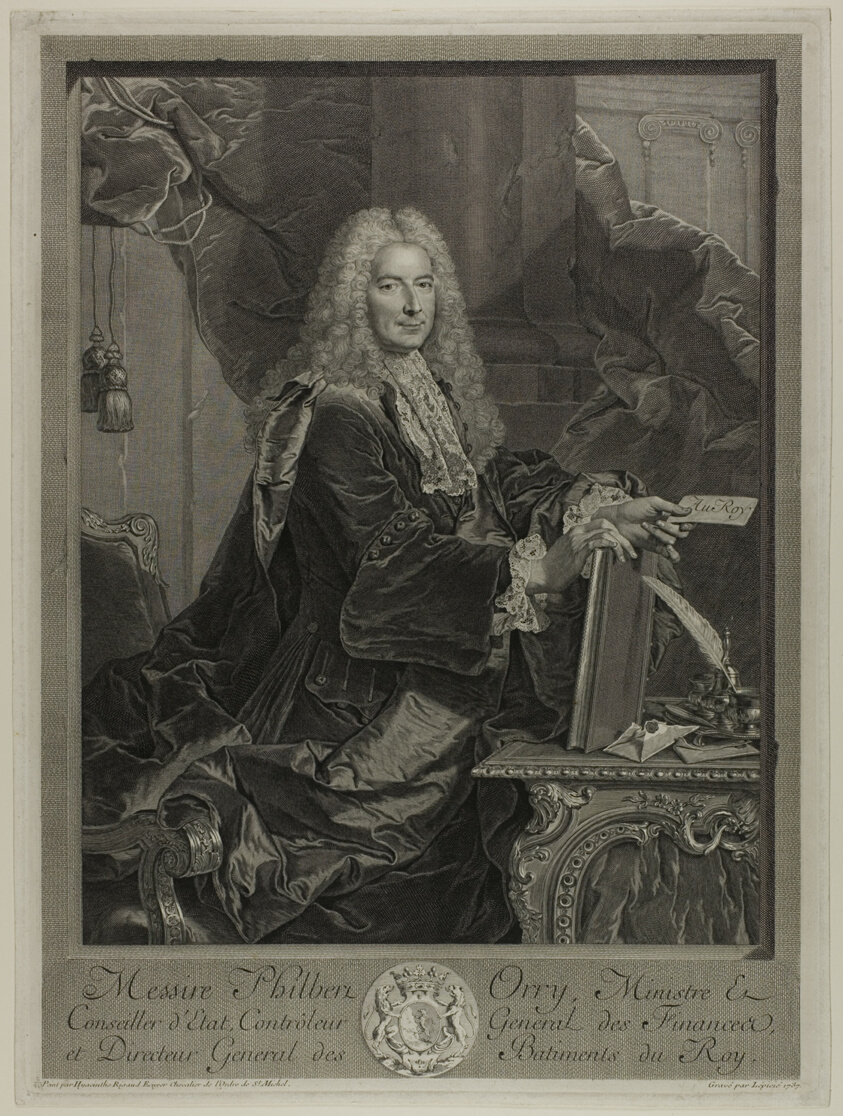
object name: Print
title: Portrait of Philibert Orrey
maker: François Bernard Lépicié (French, 1698-1755); after Hyacinthe Rigaud (French, 1659-1743)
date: 1737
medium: Engraving on paper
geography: France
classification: engraving; print; prints and drawing